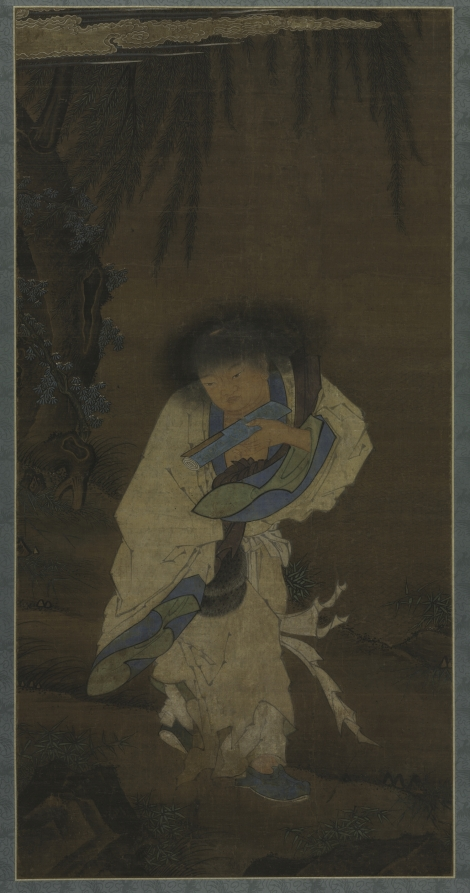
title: Poet and Recluse Hanshan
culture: China, Ming dynasty (1368–1644)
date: 1400s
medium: hanging scroll; ink and color on silk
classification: Painting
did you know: Hanshan, a Tang poet of vernacular verses, is often associated with Chan Buddhism and is considered a deity in disguise.